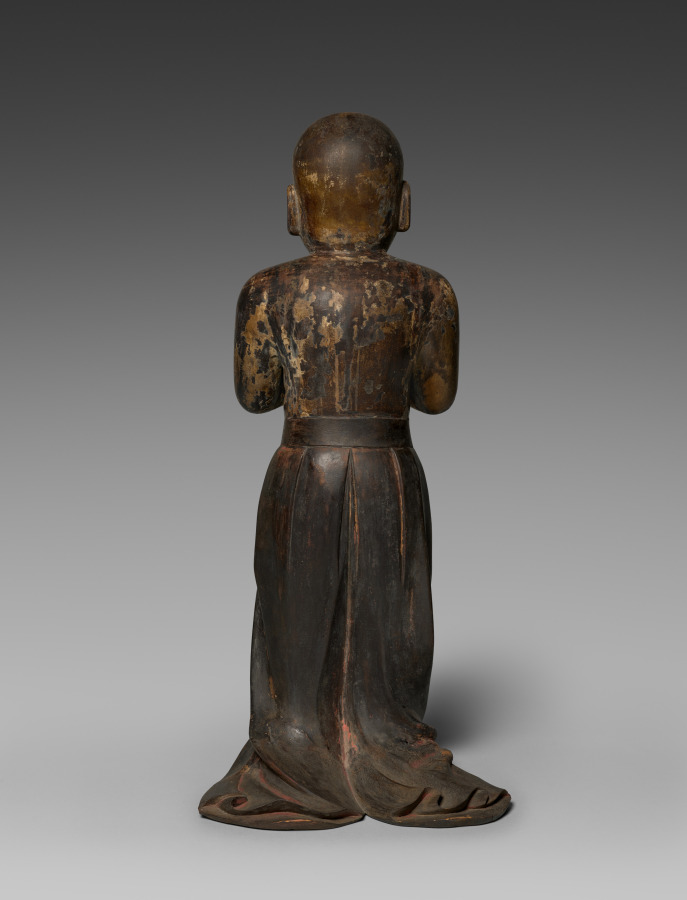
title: Prince Shōtoku at Age Two (Shōtoku Taishi)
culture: Japan, Kamakura period (1185–1333)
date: early 1300s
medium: Wood with lacquer, color, and rock-crystal inlaid eyes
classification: Sculpture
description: Two-year old Prince Shōtoku (573?–622?) places his palms together in a gesture called gasshō. Shōtoku played a major role in the introduction of Buddhism to Japan, and devotees of the prince commissioned painted and sculpted images commemorating important moments of his life. At age two, the prince faced east and chanted the name of the Buddha without having been taught the practice. This sculpture captures the fantastic event foreshadowing his future acts.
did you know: Shōtoku Taishi had several titles. One translates to "the prince of the stable door" because he was said to have been born in the imperial stables.